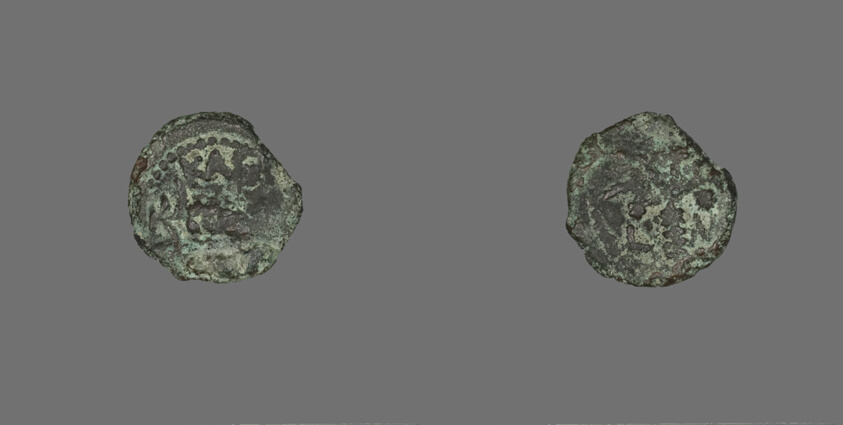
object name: Coin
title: Coin Depicting a Stalk of Grain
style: roman (ancient, style or period), ancient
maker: Roman, minted in Judaea under Prefect Marcus Ambibulus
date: 9-10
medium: Bronze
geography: Israel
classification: coin; ancient art